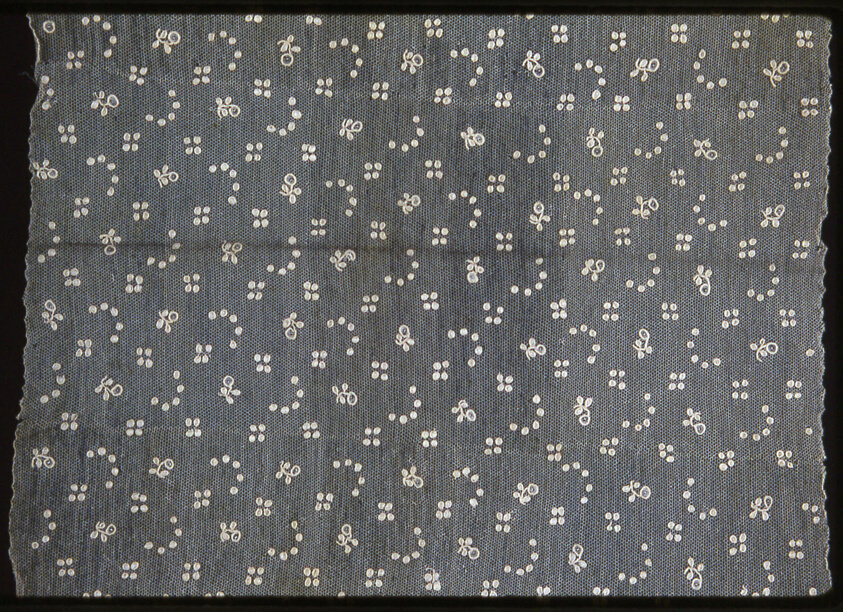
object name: Textile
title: Panel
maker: France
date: 1801/50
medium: Linen, needle lace of a type known as "Point d'Alençon"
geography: France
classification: textile; lace - needle; lace